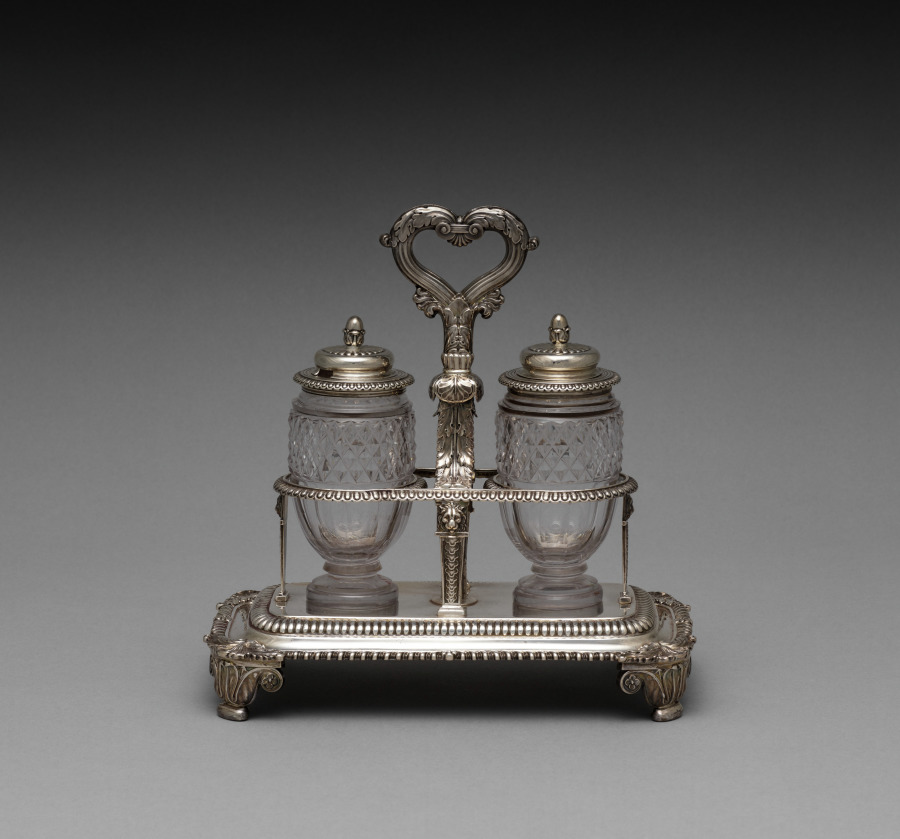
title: Cruet Set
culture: England, London, 19th century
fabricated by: Paul Storr (British, 1771–1844)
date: 1817–1818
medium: silver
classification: Silver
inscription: Stamped on lid: "PS", Lion Passant, "b".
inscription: Scratched on base of pot: "3136".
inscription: Stamped underside of base: "PS", Lion Passant, Crowned Leopard, "b", George III duty mark.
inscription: Scratched underside: "56\ Eoxx \moxx", "6087", "SRH-".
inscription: "2" engraved on base leg of stand and by pin on underside.